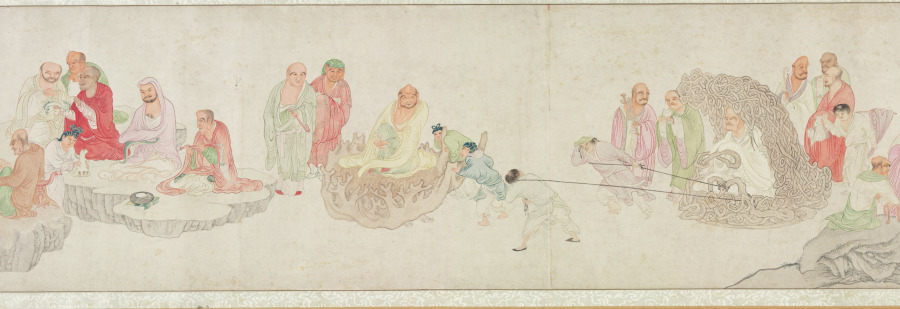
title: The Five Hundred Arhats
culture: China, Ming dynasty (1368–1644)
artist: Wu Bin (Chinese, active c. 1591–1626)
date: 1591–1626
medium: Handscroll; ink and color on paper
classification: Painting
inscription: 枝隱頭陀吳彬齋心拜寫 [印]吳彬之印; 文中父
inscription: 7 seals of Qianlong emperor (r. 1736–95): Gu xi tian zi 古希天子; Shou 壽; Qianlong jian shang 乾隆鑑賞; San xi tang jing jian xi 三希堂精鑑璽; Yi zi sun 宜子孫; Tai shang huang di zhi bao 太上皇帝之寳; Qian qing gong bao 乾清宮寶.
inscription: 6 seals of Cheng Qi 程琦 (1911–1988): Ke an geng zi wu shi yi hou suo de ming ji 可菴庚子五十以後所得名跡; 5 other Cheng Qi seals.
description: More than 66 feet long, this handscroll depicts 447 luohans, 72 attendants, and the bodhisattva of compassion at its very end. Luohans (arhats in Sanskrit), disciples of the Buddha and protectors of the Buddha’s law, possess supernatural powers and take on myriad external appearances. The amusing assortment of characters are engaged in an array of religious, secular, and miraculous activities. The painter used stylistic features borrowed from earlier artists, carefully controlled lines, and refined coloring. Wu Bin was a lay Buddhist and depicting this sort of image was part of a religious practice seeking understanding of the Buddha’s teaching.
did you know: Far advanced on the path to enlightenment, arhats have the capacity to tame tigers, free dragons, and to float on water or in the air.